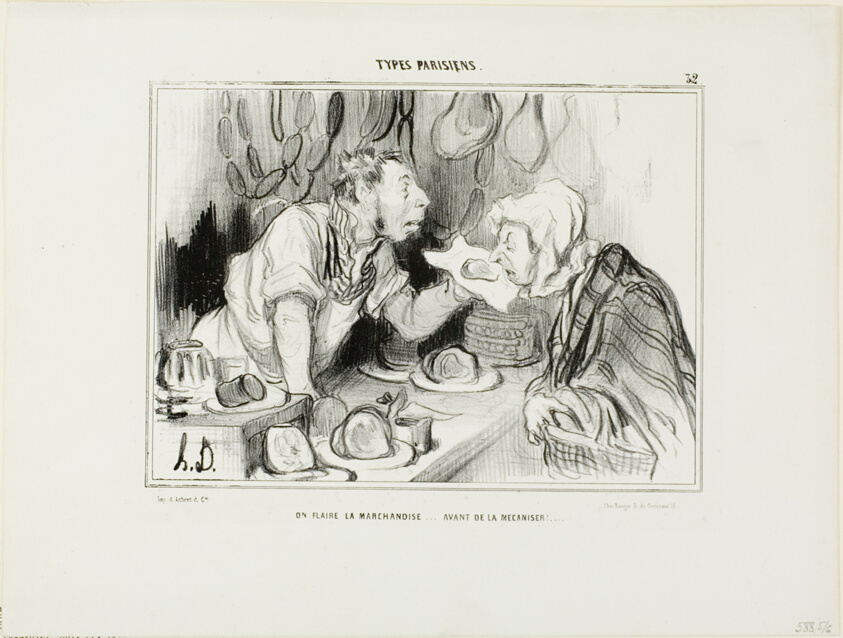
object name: Print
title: “You Sniff the Merchandise… Before Buying It,” plate 32 from Types Parisiens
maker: Honoré Victorin Daumier; French, 1808-1879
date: 1839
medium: Lithograph in black on white wove paper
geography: France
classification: lithograph; print; prints and drawing